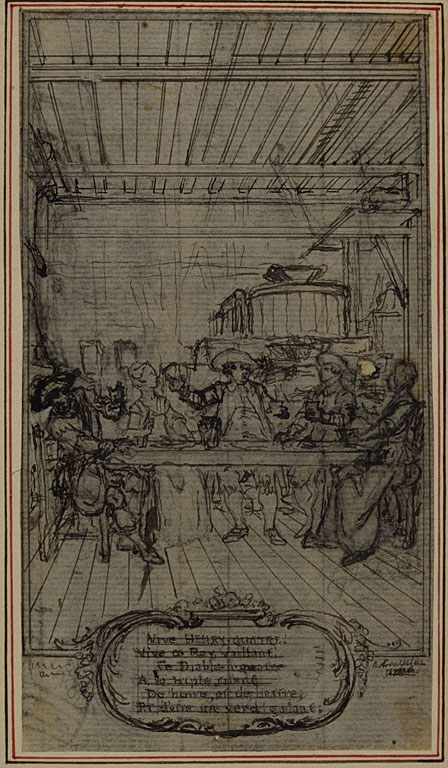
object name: Drawing and Watercolor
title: Study for Vignette-Frontispiece of Colle's "La Partie de Chasse de Henri IV", Act III, Vive Henry Quatre!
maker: Hubert François Gravelot (French, 1699-1773)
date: c. 1766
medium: Pen and black ink, with touches of graphite, on gray laid paper, incised for transfer and perimeter mounted on cream laid paper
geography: France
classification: pen and ink drawings; drawings (visual works); prints and drawing